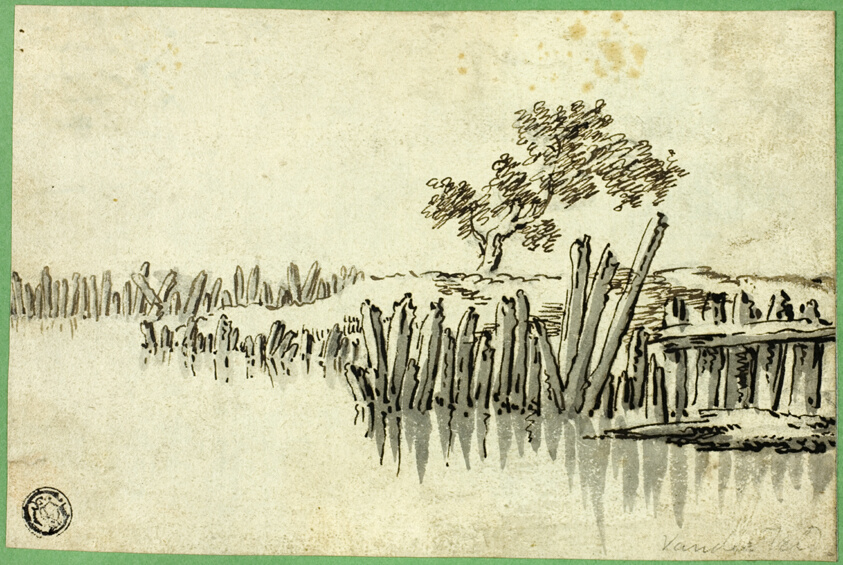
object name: Drawing and Watercolor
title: Stream with Pilings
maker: Willem van de Velde, I (Dutch, 1611-1693); or Esaias van de Velde, I (Dutch, 1587-1630)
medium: Pen and brown ink, with brush and gray wash, on ivory wove paper, laid down on green wove card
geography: Holland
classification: pen and ink drawings; drawings (visual works); prints and drawing